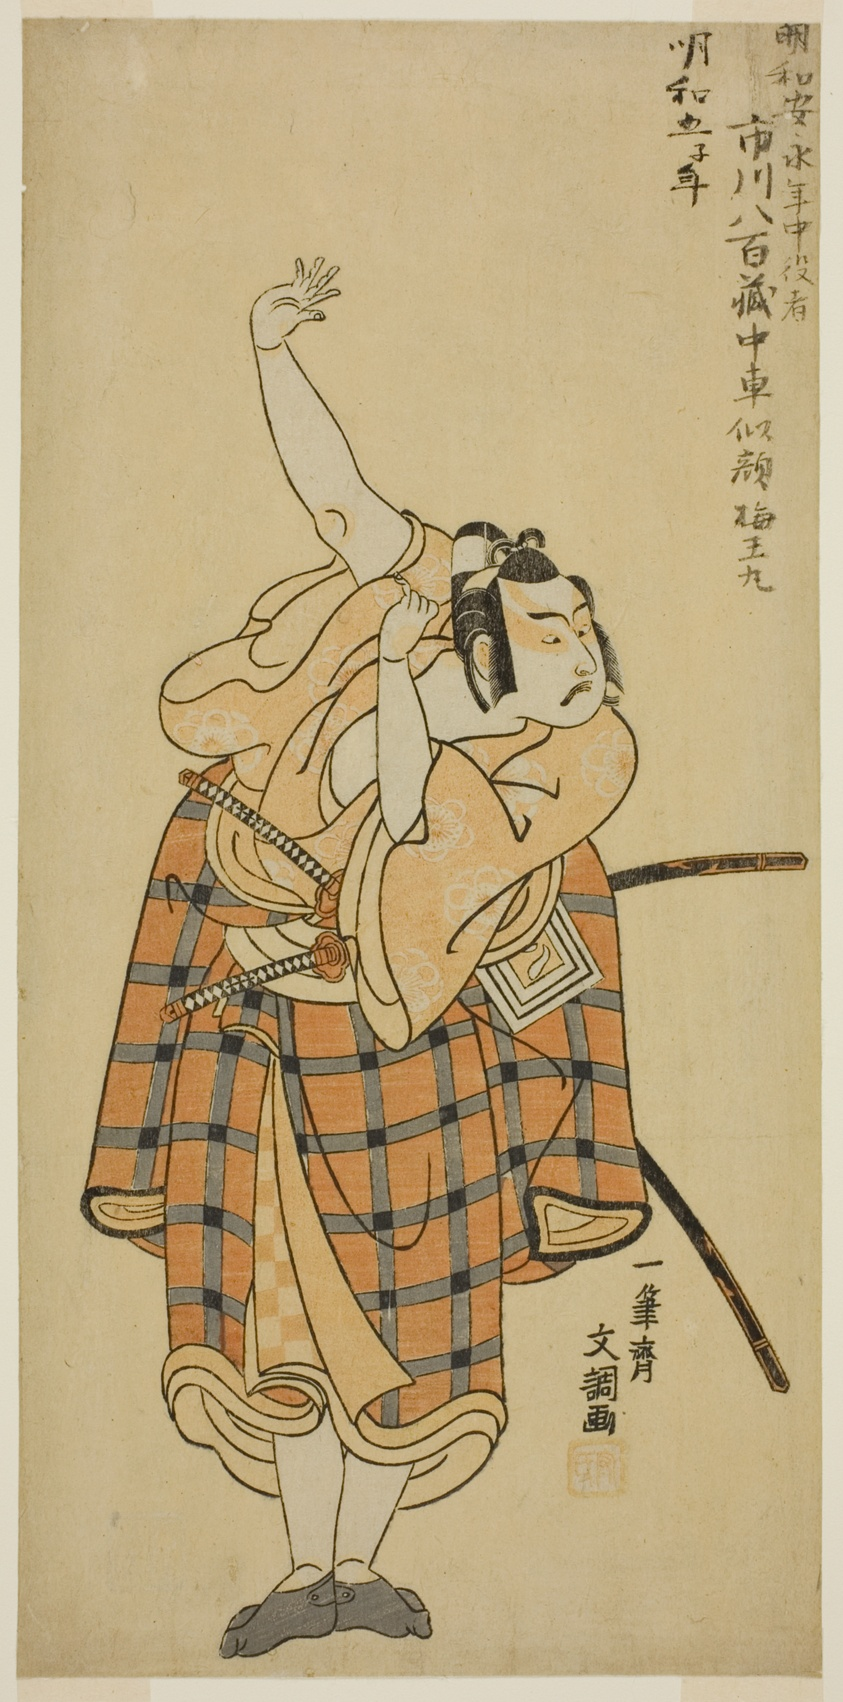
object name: Print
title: The Actor Ichikawa Yaozo II as Umeo-maru in the Play Ayatsuri Kabuki Ogi, Performed at the Nakamura Theater in the Seventh Month, 1768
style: Japanese (culture or style)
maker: Ippitsusai Buncho (Japanese, active c. 1755-90)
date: c. 1768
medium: Color woodblock print; hosoban; left sheet of triptych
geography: Japan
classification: woodblock print; print; asian art